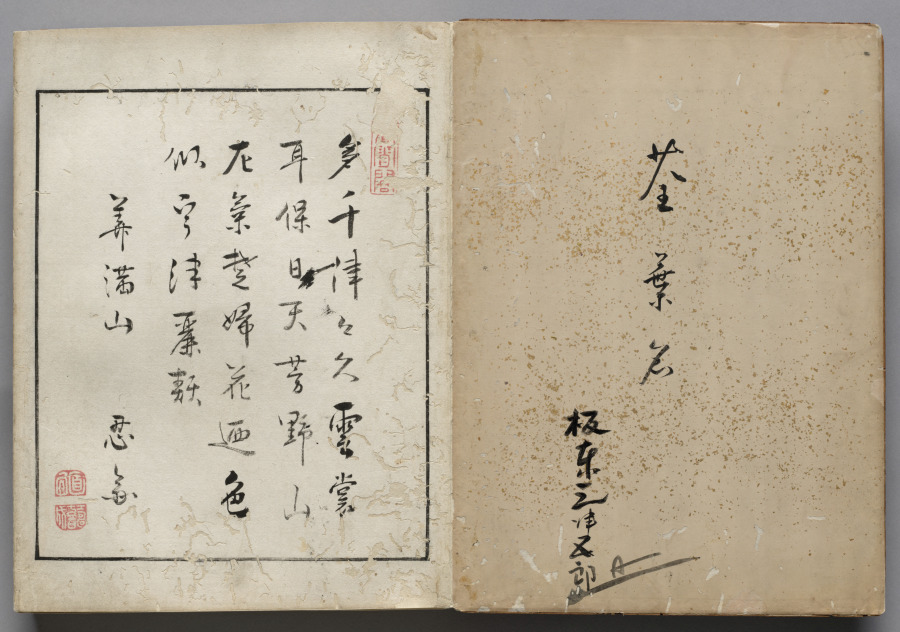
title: Leaf from Accordion-Style Album of Actor Portraits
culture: Japan, Edo period (1615–1868)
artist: Shōrakusai (Japanese)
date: c. 1790–1810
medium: leaf from accordion-style album; ink on paper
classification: Bound Volume